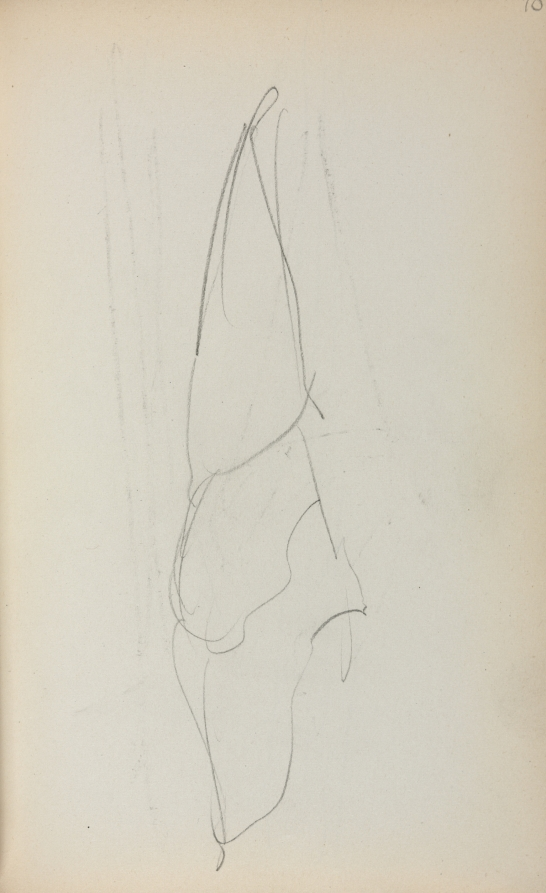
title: Italian Sketchbook; Sail (page 70)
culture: America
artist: Maurice Prendergast (American, born Newfoundland [now Canada], 1858–1924)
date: 1898–1899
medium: pencil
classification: Bound Volume